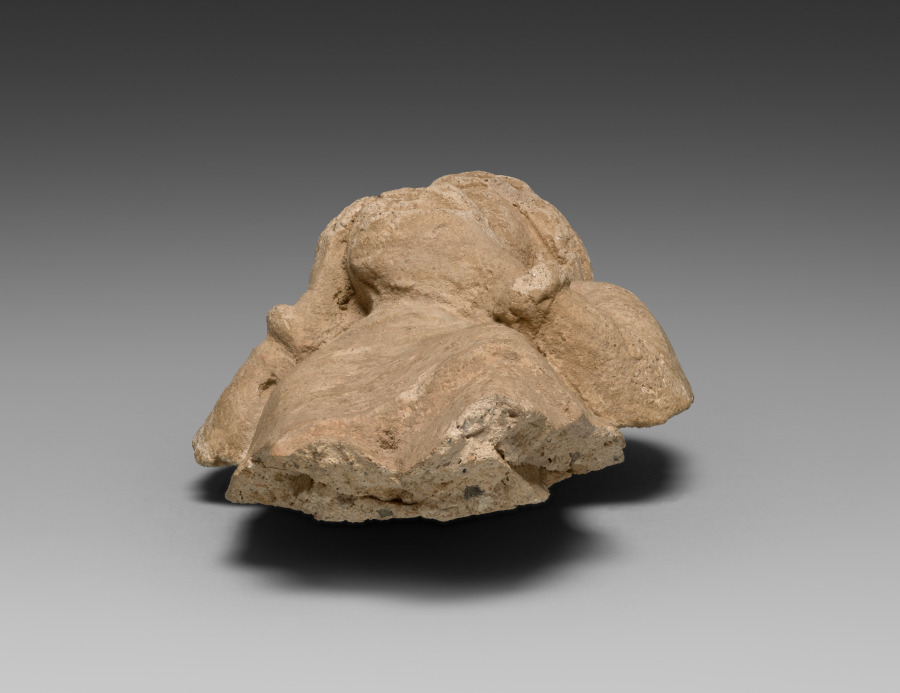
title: Layman bearing offerings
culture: Afghanistan, Hadda, probably Tape Shotor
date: c. 300 CE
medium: stucco with mother-of-pearl inlay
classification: Sculpture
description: The Buddhist monasteries at Hadda were famous internationally until their destruction by fire in the 800s CE. One thousand years later, a British explorer named Charles Masson (1800–1853) documented the site and collected many sculptures from the ruins that are now in the British Museum in London. French archaeologists carried out systematic excavations between 1926 and 1929. They brought many sculptures to the National Museum of Asian Art, Guimet, in Paris. Some sculptures entered other museum and private collections around the world. In the 1970s, Afghan archaeologists continued to document the Buddhist sites of Hadda and brought many more sculptures to the National Museum of Afghanistan in Kabul.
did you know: The Buddhist community (sangha) consists of both monks and laypeople who brought wealth to support the monasteries at Hadda.